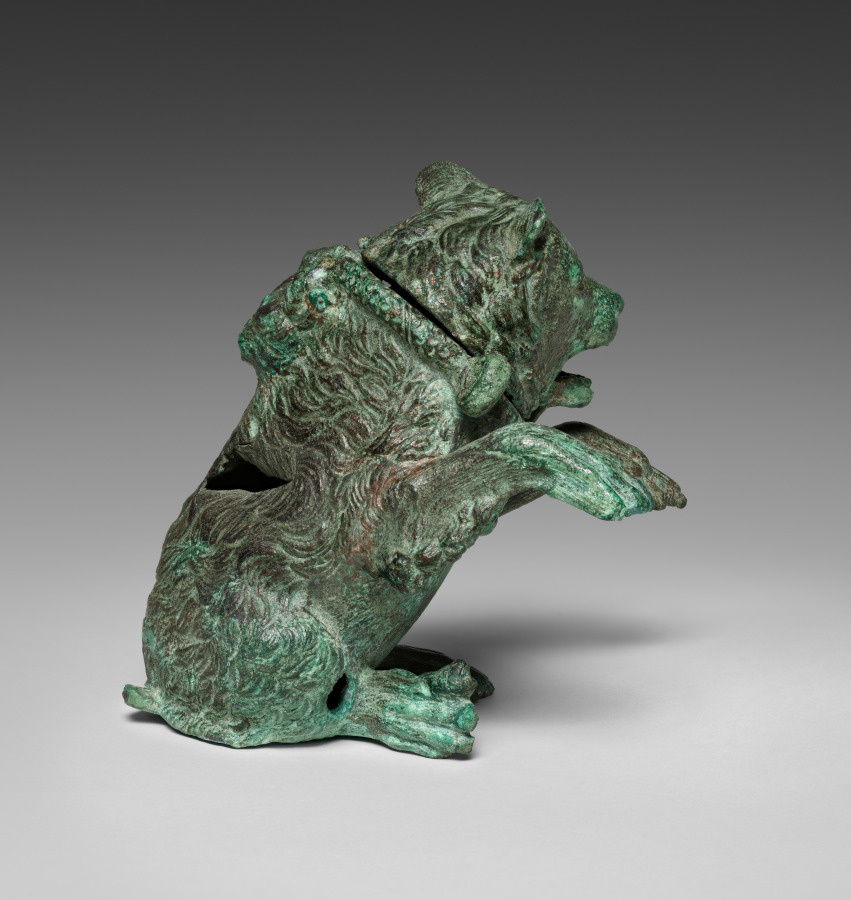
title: Oil Ampulla in the Form of a Dancing Bear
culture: Italy, Roman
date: 200s CE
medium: bronze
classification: Sculpture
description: This bronze bear sits on its hindquarters with its front paws raised, head slightly turned left, and mouth gaping open. It wears a collar around its neck with two rings on either side, where a chain would be passed through to suspend the ampulla. The bear’s head is hinged at the back of the collar to open the vessel, with the lower jaw forming a spout. The eyes were once pierced to prevent an airlock within the ampulla. Bears, like many other animals in antiquity, were used as a form of entertainment, demonstrated here by the bear’s “dancing” pose.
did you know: This ampulla was likely used to carry oil to the baths in antiquity.